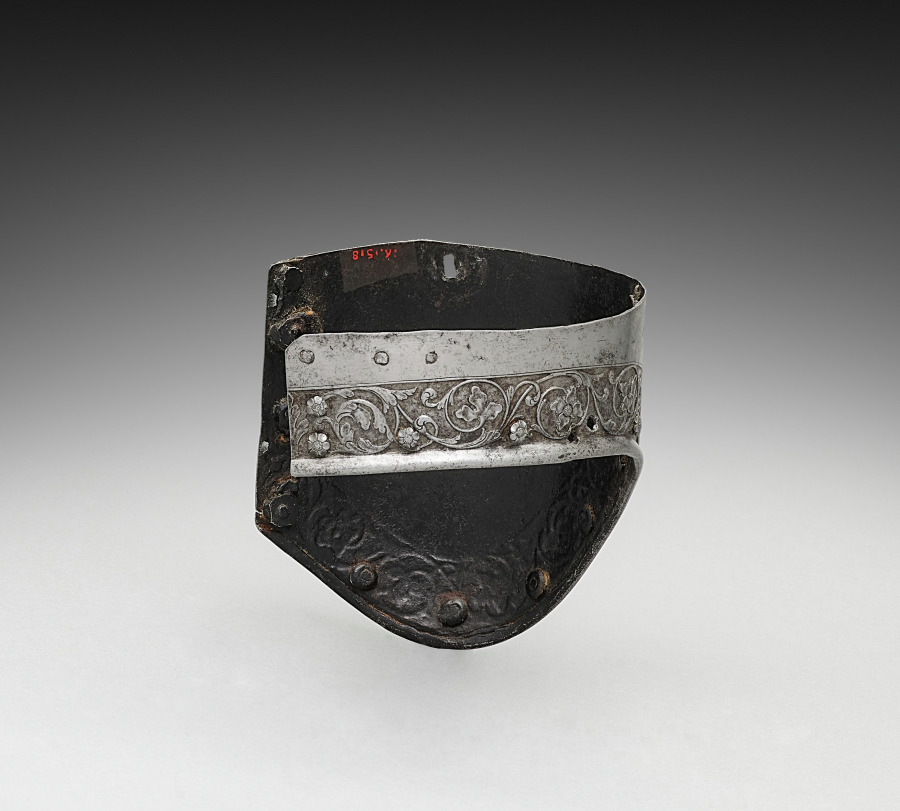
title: Upper Arm Canon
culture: Italy, Milanese Style, probably 19th century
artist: attributed to Negroli Workshop (Italian, c. 1500–1561)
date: 1800s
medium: steel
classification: Arms and Armor